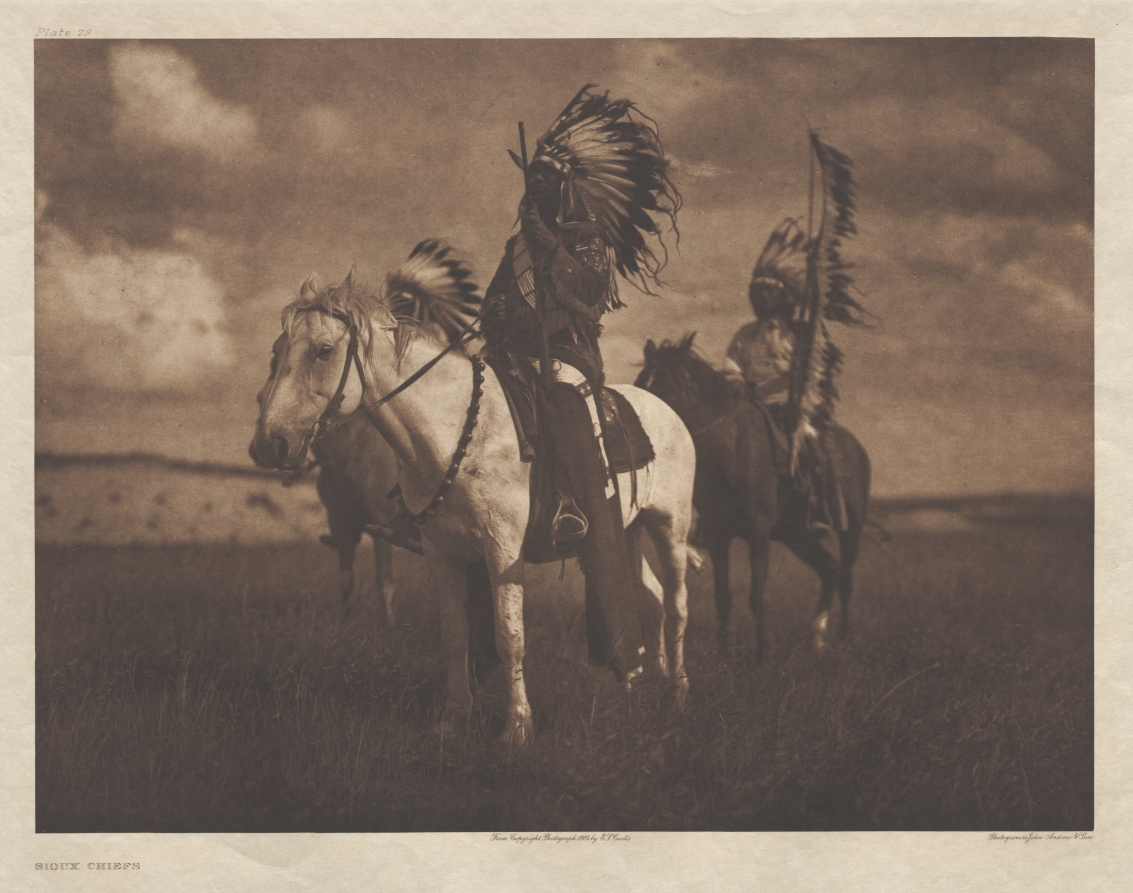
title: Portfolio III, Plate 79: Sioux Chiefs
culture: America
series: The North American Indian: being a series of Portfolios picturing and describing the Indians of the United States, the Dominion of Canada, and Alaska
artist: Edward S. Curtis (American, 1868–1952)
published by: The University Press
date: 1905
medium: photogravure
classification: Portfolio